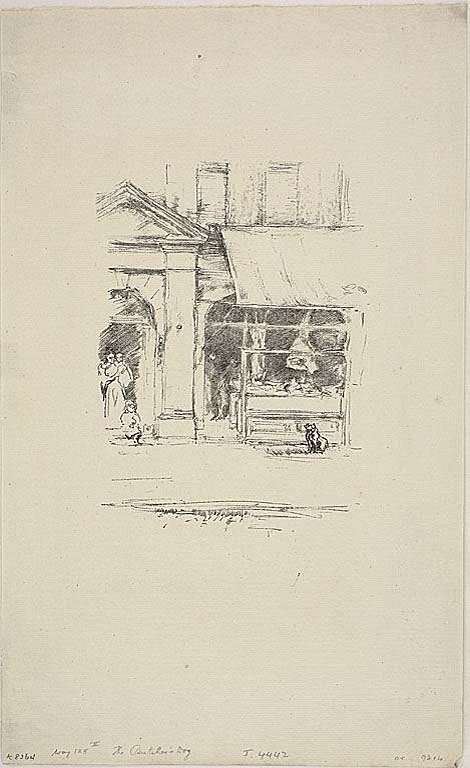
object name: Print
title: The Butcher's Dog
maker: James McNeill Whistler (American, 1834-1903)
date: 1896, printed 1904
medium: Transfer lithograph in black on ivory laid paper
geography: United States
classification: transfer lithograph; lithograph; print; prints and drawing; paper